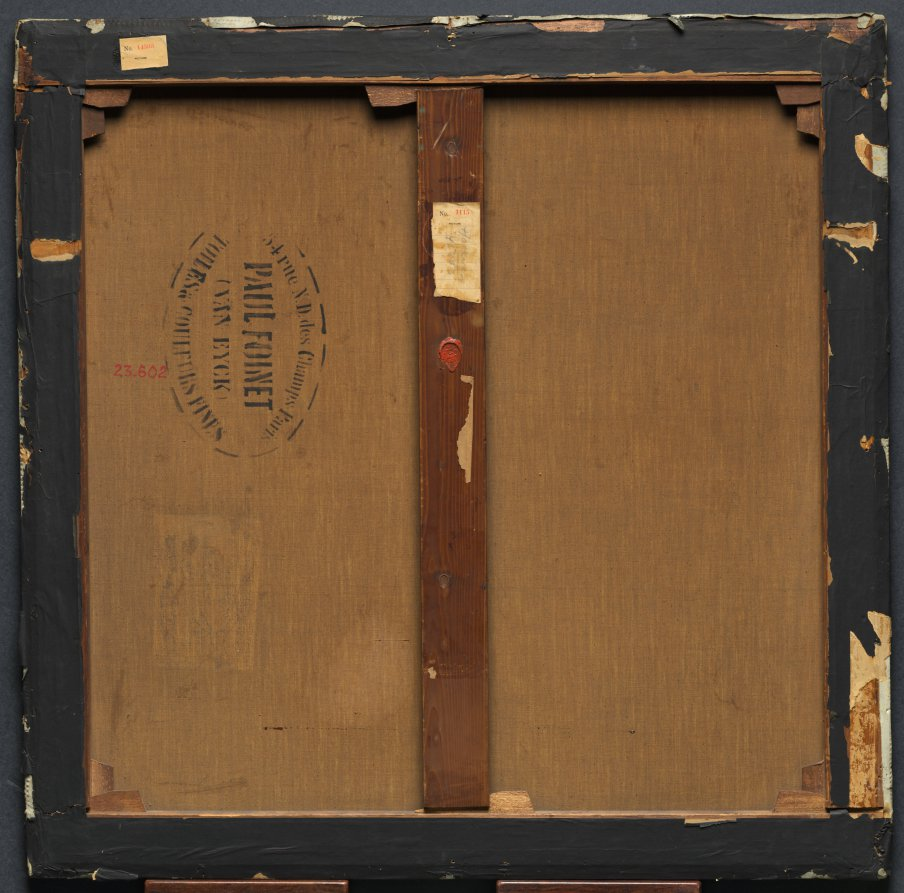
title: Midnight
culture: France, 19th century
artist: Jean-Charles Cazin (French, 1841–1901)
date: 1891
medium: oil on fabric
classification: Painting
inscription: Signed lower right: j. c. cazin. 91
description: This painting depicts Abbeville, a city in northern France famous for its canals and architecture. It lies near the seaport of Boulogne-sur-Mer, Cazin's hometown and where he spent the last decades of his life painting the countryside, beaches, and nearby towns. Cazin specialized in landscapes, often influenced by his knowledge of English and Dutch painters. The title, Midnight, and the image itself suggest silence and stillness—Cazin's hallmarks—but only rarely did he attain this almost surrealistic atmosphere. Cazin was educated in Paris at the famous Ecole Gratuite de Dessins (Free School of Drawing), an innovative and unorthodox institution teaching drawing from memory. He studied there with fellow artists Henri Fantin-Latour (1836–1904), Auguste Rodin (1840–1917), and Alphonse Legros (1837–1911). They all shared an interest in Symbolism—the movement that sees symbols in reality and perceives reality through symbols.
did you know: Cazin preferred to paint in his studio using memory techniques learned in his artistic training which he later passed on to his own students.